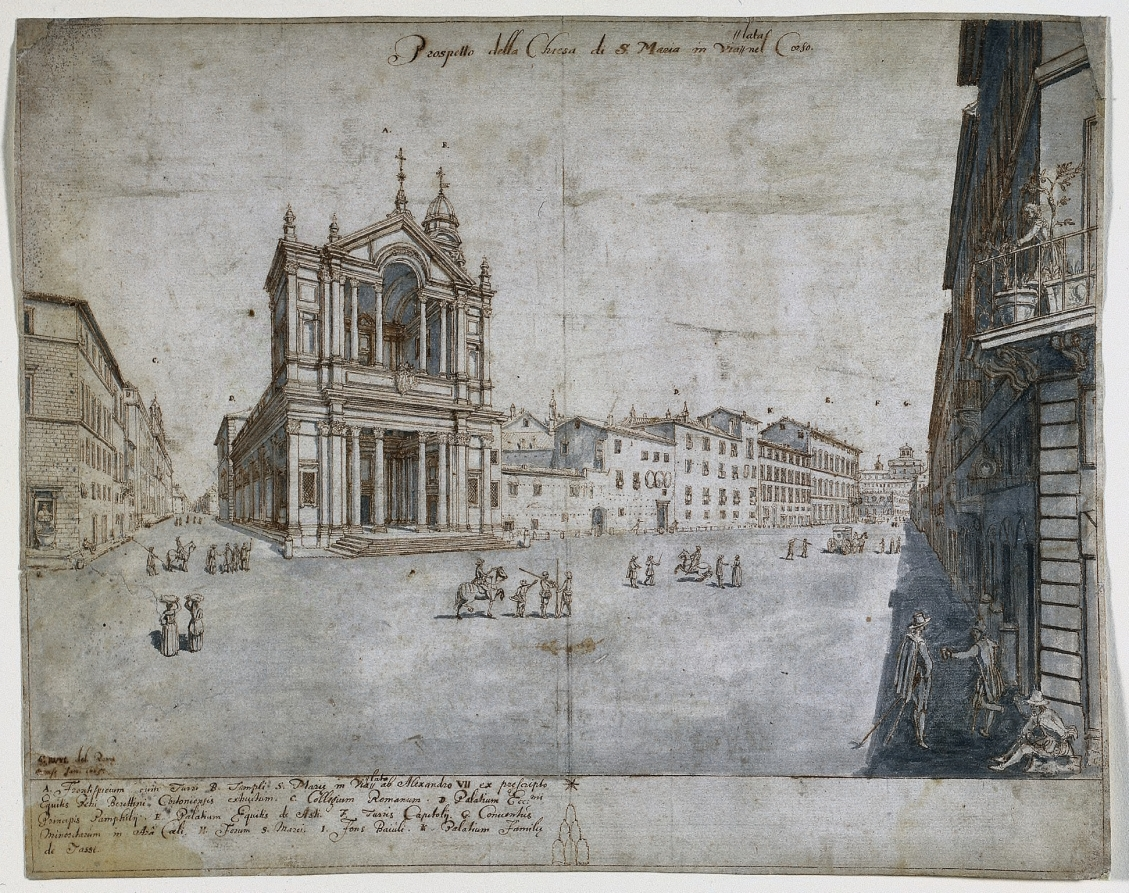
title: Eighteen Views of Rome: Santa Maria in Via Lata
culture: Flanders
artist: Lievin Cruyl (Flemish, c. 1640-c. 1720)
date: 1665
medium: pen and brown ink and brush and gray wash over graphite; framing lines in brown ink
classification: Drawing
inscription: signed, lower left, in brown ink: [artist monogram: LC] RVYL del. Romæ / mense Jan. 1665. ; by artist, upper center, in brown ink: Prospetto della Chiesa di S. Maria in Via// [double slashes acting as insert mark for addition to inscription, by artist, directly above: //lata] nel Corso. ; by artist, throughout composition, in brown ink: [the letters A-K] ; by artist, lower left, in brown ink: A. Frontispicium cum Turri B. Templi S. Mariæ in Via// [double slashes acting as insert mark for addition to inscription, by artist, directly above: //lata] ab Alexandro VII ex prescripto / Equitis Petri Berettini Cortonensis extructum. C. Collegium Romanum. D. Palatium Ecc:mi [mi in superscript] / Principis Pamphilij. E. Palatium Equitis de Asti. F. Turris Capitolij G. Conventus / Minoritarum in Arâ Coeli. H. Forum S. Marci. I. Fons Baiùli. M. Palatium Familiæ / de Tassi. ; VERSO, lower left, in brown ink: [S45 ?] [partially masked, sideways] ; ON STRIPS OF PAPER MOUNTED TO VERSO, lower center, in graphite: A20982 ; lower right, in graphite: E.9